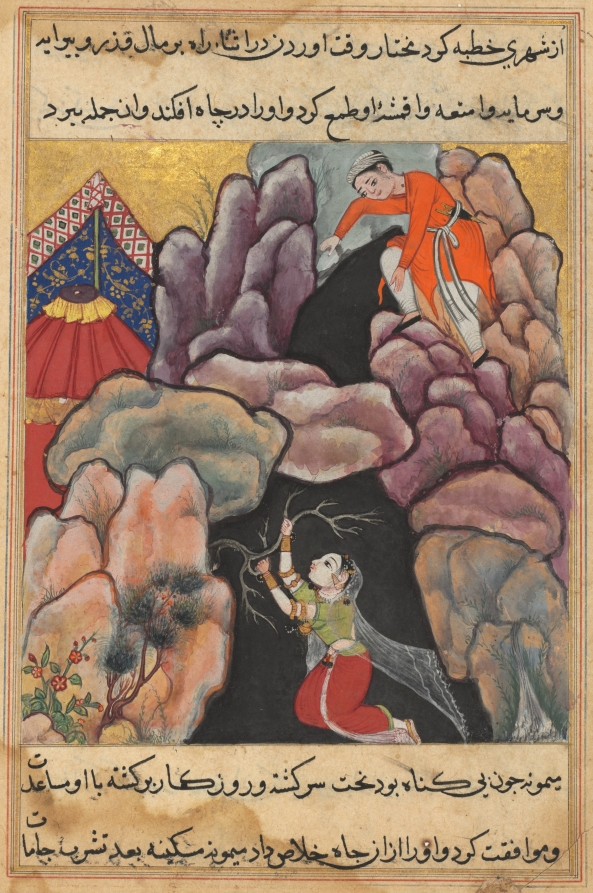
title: Mukhtar throws his wife Maimuna into the pit, but she saves herself, from a Tuti-nama (Tales of a Parrot): Twenty-fifth Night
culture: Mughal India, court of Akbar (reigned 1556–1605)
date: c. 1560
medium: gum tempera, ink, and gold on paper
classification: Painting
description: Maimuna clings to a branch in a dark pit while her villainous husband watches from above. He threw her into the pit in an attempt to steal her possessions. However, because Maimuna was guiltless, luck and fate saved her from an untimely death.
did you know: The artist shows the mouth of the pit at the top and in cross-section below.